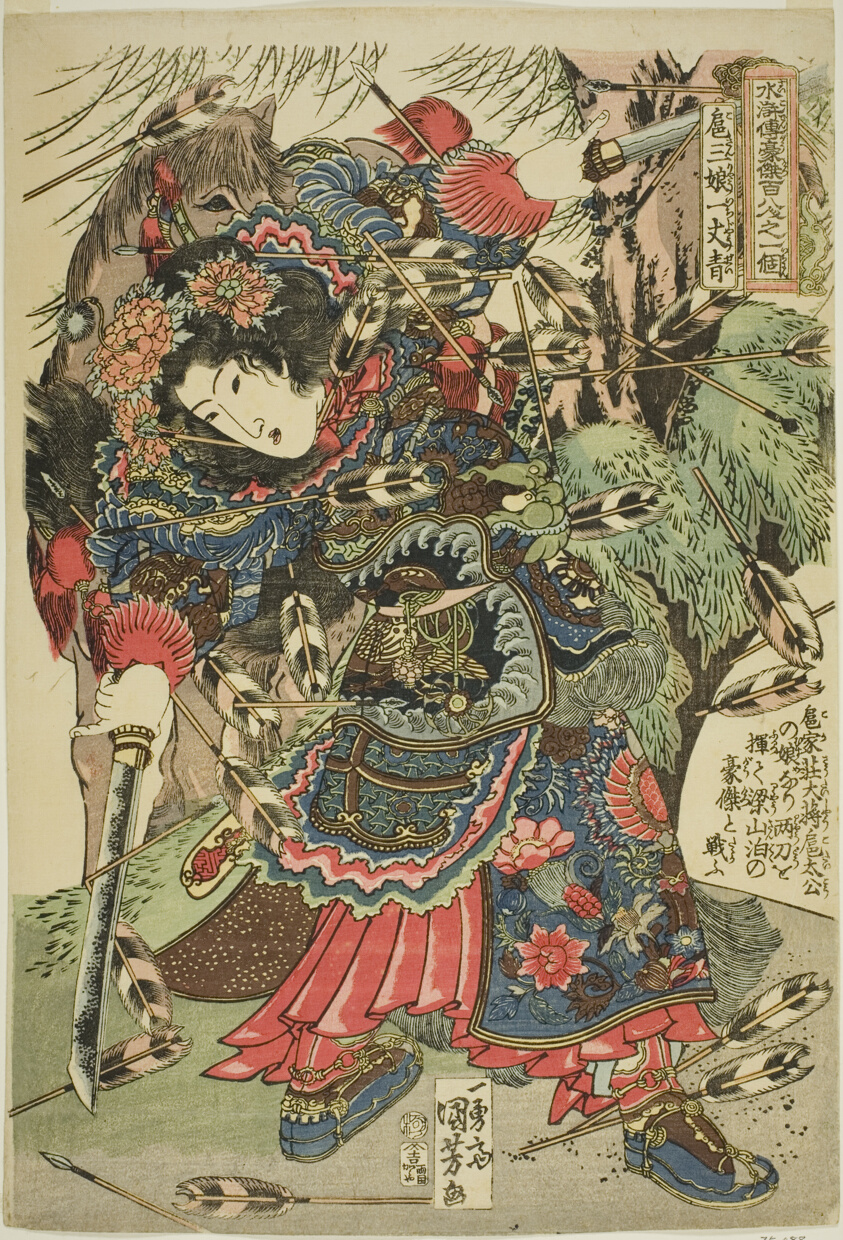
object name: Print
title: Hu Sanniang (Ko Sanjo Ichijosei), from the series "One Hundred and Eight Heroes of the Popular Water Margin (Tsuzoku Suikoden goketsu hyakuhachinin no hitori)"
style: Japanese (culture or style)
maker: Utagawa Kuniyoshi (Japanese, 1797-1861)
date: c. 1827/30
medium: Color woodblock print; oban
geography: Japan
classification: woodblock print; print; asian art